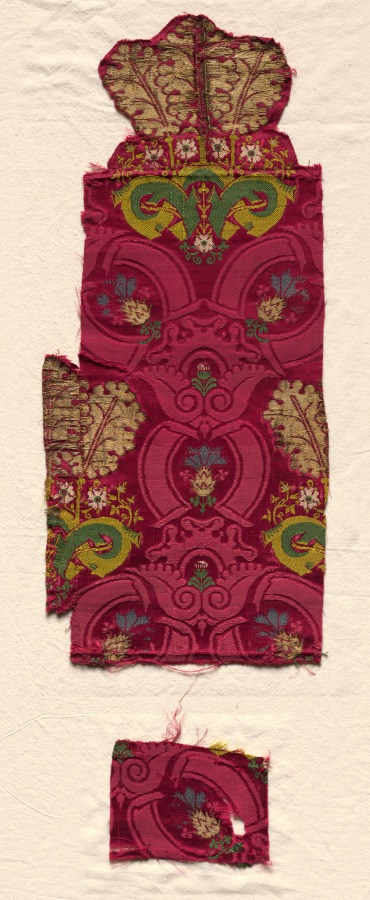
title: Fragments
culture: Spain, second half of 15th century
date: second half of 15th century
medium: brocaded silk with metal thread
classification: Textile